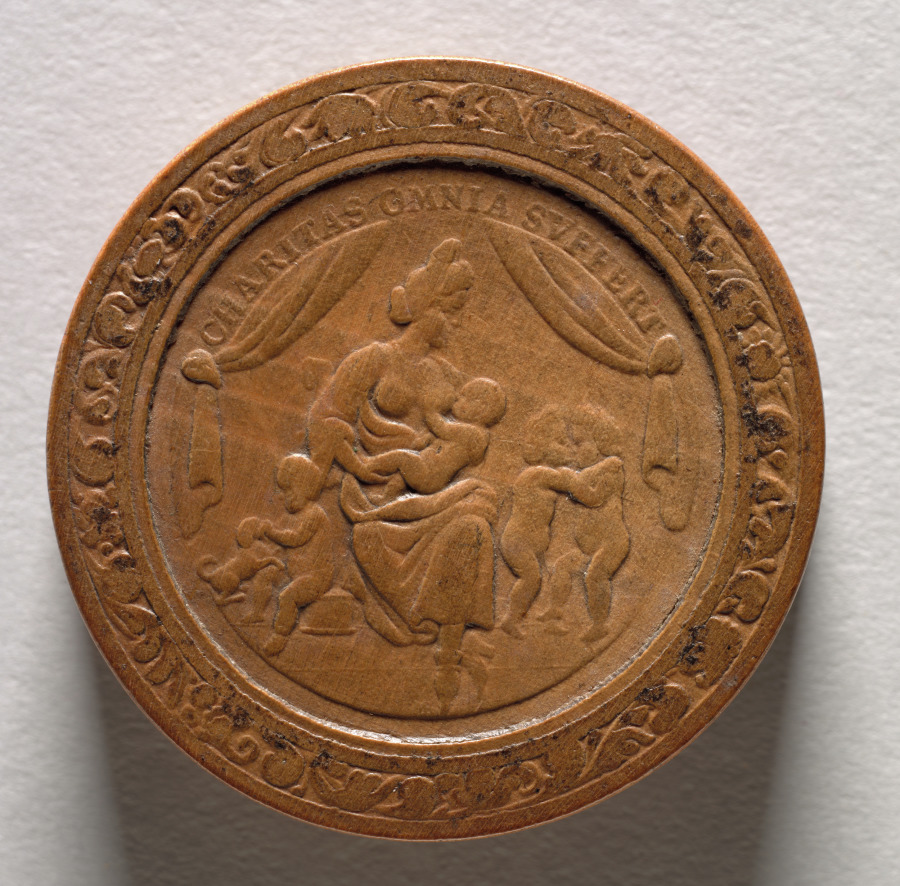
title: Gaming Piece (reverse)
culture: Germany, late 17th-early 18th Century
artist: Martin Brunner (German, 1659–1725)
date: c.1700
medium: wood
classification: Furniture and woodwork